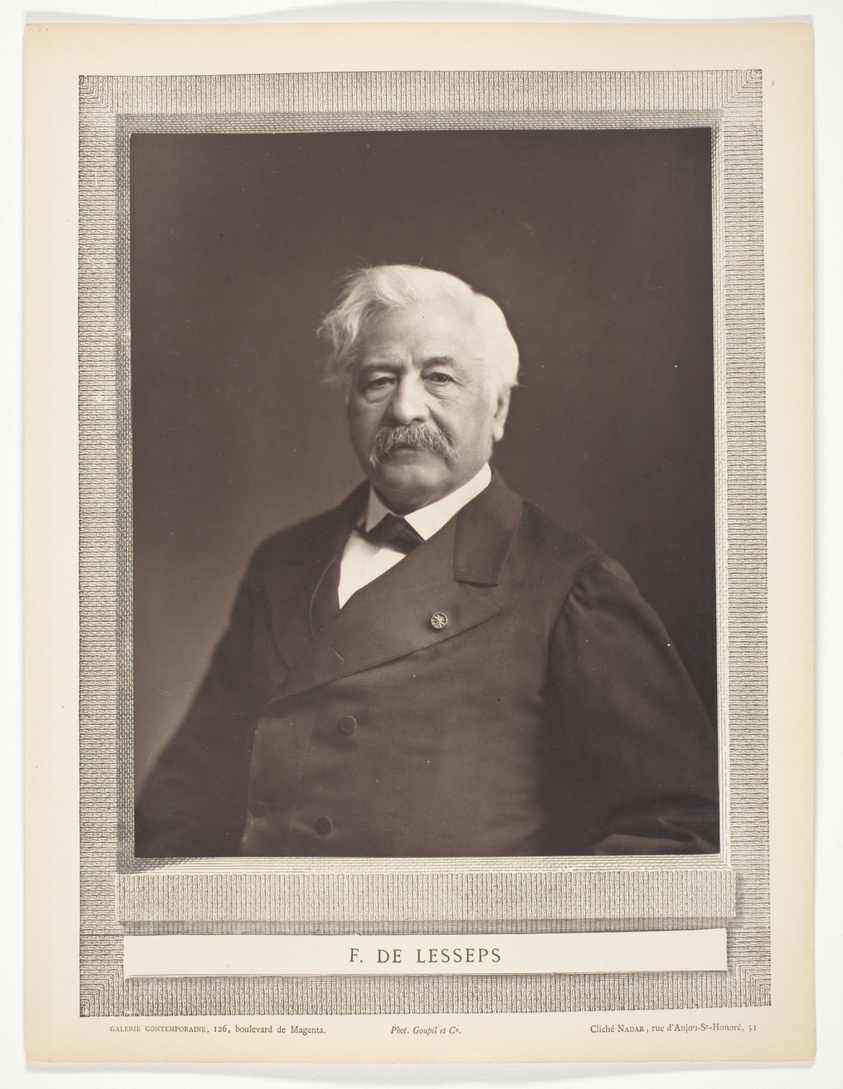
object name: Photograph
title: F. de Lesseps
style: 19th century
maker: Nadar (Gaspard Félix Tournachon) (French, 1820–1910)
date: c. 1876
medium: Woodburytype, from the periodical “Galerie Contemporaine Littéraire, Artistique” (1876), volume 1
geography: France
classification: woodburytype; photomechanical process; photography; photograph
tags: Collected by Hugh Edwards, Contemporaine Littéraire